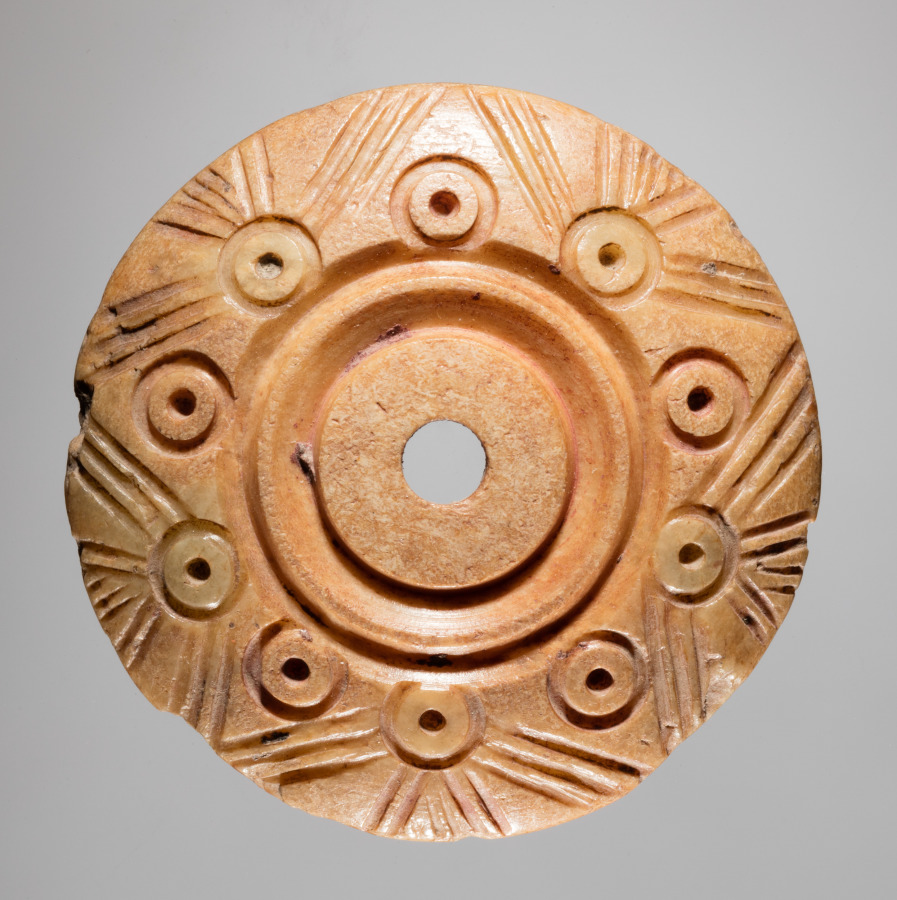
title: Spindle Whorl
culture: Iran, early Islamic period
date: 700s - 900s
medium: bone, incised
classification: Spindle Whorl